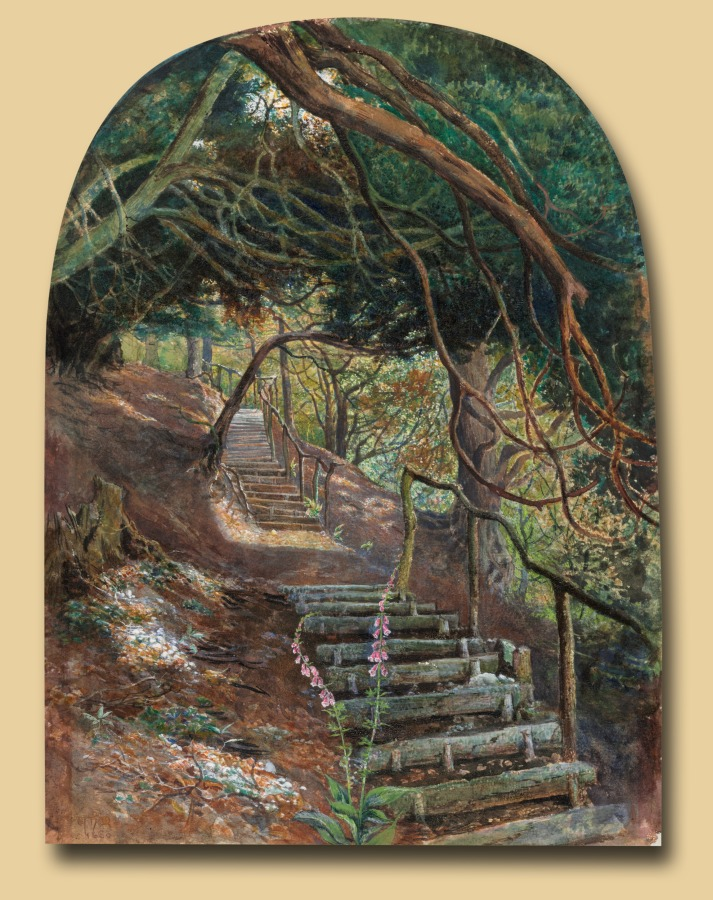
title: Steps in a Garden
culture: England, 19th century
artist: William Henry Millais (British, 1828–1899)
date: 1860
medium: watercolor and gouache with scratch-away technique to create highlights on sturdy-weight wove paper mounted to same by artist with color tests in margins of mount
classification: Drawing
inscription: initialed, in orange paint over purple paint, at lower left: WHM; inscribed, in purple paint, at lower left: 1860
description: William Henry Millais was closely associated with the founding members of the Pre-Raphaelite Brotherhood. He sketched extensively from nature in the early 1850s. Here, Millais painted a sequestered landscape of rough-hewn steps ascending a shady slope. A smattering of light pierces a dense canopy of trees, allowing little to flourish except for the foxgloves that adorn the foreground. Ivy growing on the hillside, a decaying stump, and moss-covered steps suggest the passage of time.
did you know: William Henry Millais's brother John Everett was a founder of the Pre-Raphaelite brotherhood and encouraged the older artist to pursue landscape as a subject.